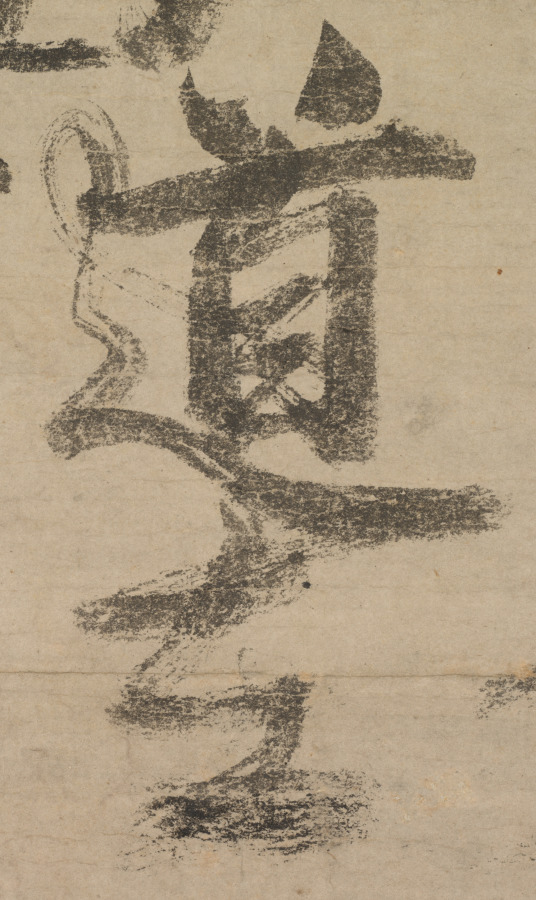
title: Reflections of Priest Foyen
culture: Japan, Muromachi period (1392–1573)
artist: Ikkyū Sōjun (Japanese, 1394–1481)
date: 1400s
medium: hanging scroll, ink on paper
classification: Painting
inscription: signed: "Kido nanasei son, Ikkyūshi Sōjun sho (Written by Ikkyū Sōjun, the seventh generation of Kido)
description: Left by his mother at a small Zen temple in Kyoto at the age of six, Ikkyu later drew on his early studies and experiences for his writings, which focused on his keen interest in the Chinese classics. Poetry in particular was a favorite subject and images from classical poetry or passages from favorite poems or commentaries frequently provided Ikkyu with the core ideas for his own work. A rare example of his calligraphy, this narrow scroll contains a verse in eight phrases, each comprising four characters. The whole verse is organized in three towering lines of brusque, emphatic calligraphy augmented by Ikkyu's signature-the two lines of running script in the lower left corner. The text refers to a passage included in the Chronicle of the Zen Sect that contains a cautionary reminder attributed to the legendary Chinese monk Foyen Qingyuan (1067-1120), long revered in Japan. The initial phrase begins: "Life is a mirage."